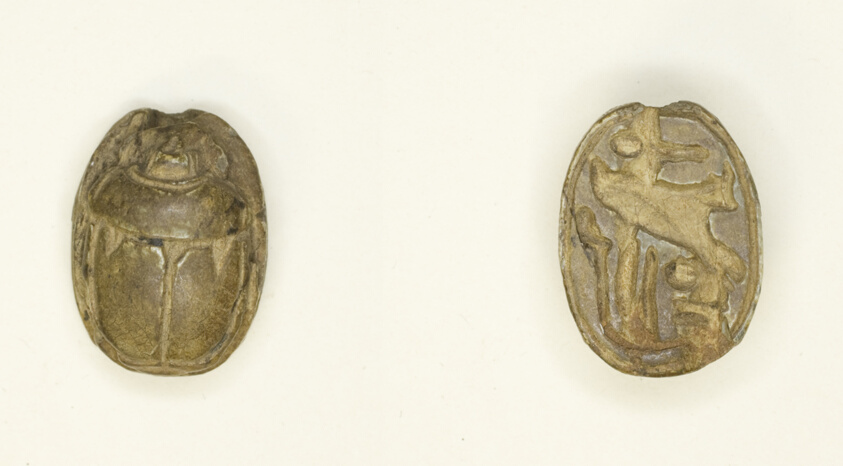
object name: Costume and Accessories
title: Scarab: Wish Formula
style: egyptian, ancient, late period (egyptian), new kingdom, third intermediate period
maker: Egyptian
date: New Kingdom–Late Period, Dynasties 19–26 (about 1295–525 BCE)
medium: Steatite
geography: Egypt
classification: scarab; ancient art; costume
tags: Hieroglyphs, deities, gods (deities), insects